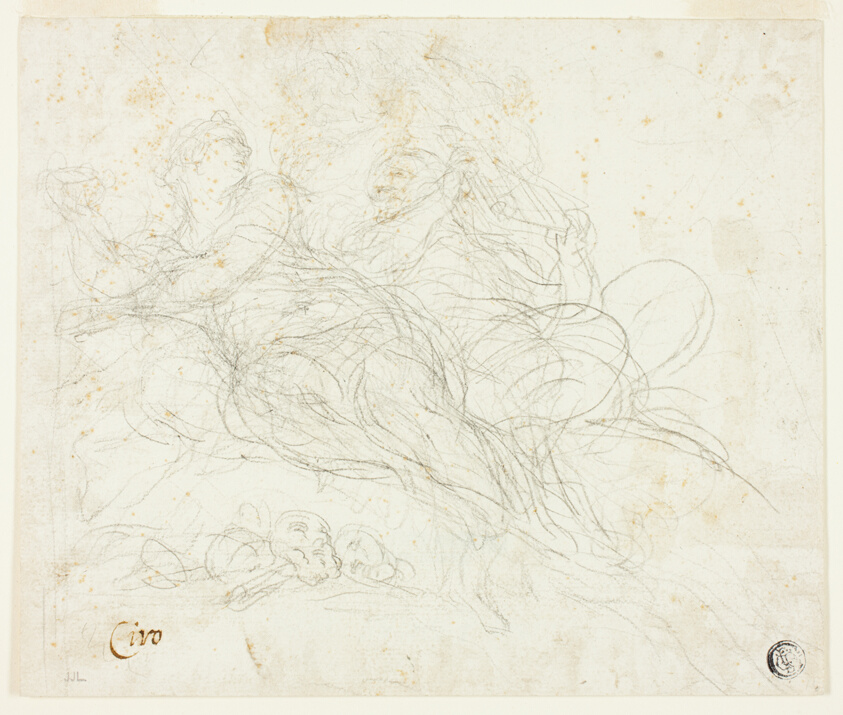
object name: Drawing and Watercolor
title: Nymph and Satyr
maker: Ciro Ferri (Italian, 1634-1689)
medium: Black chalk on ivory laid paper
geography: Italy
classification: chalk; drawings (visual works); prints and drawing